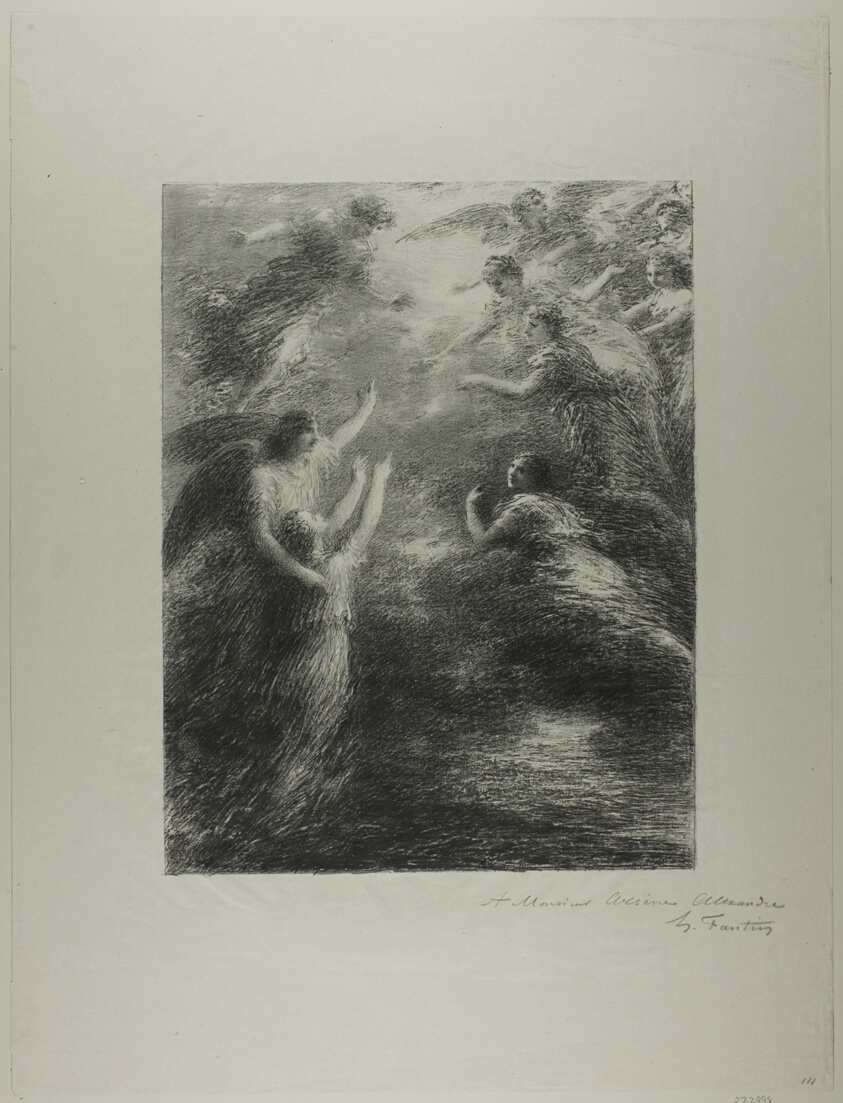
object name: Print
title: Paradise and the Peri: Finale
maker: Henri Fantin-Latour (French, 1836-1904)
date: 1893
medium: Lithograph in black on ivory chine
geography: France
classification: lithograph; print; prints and drawing